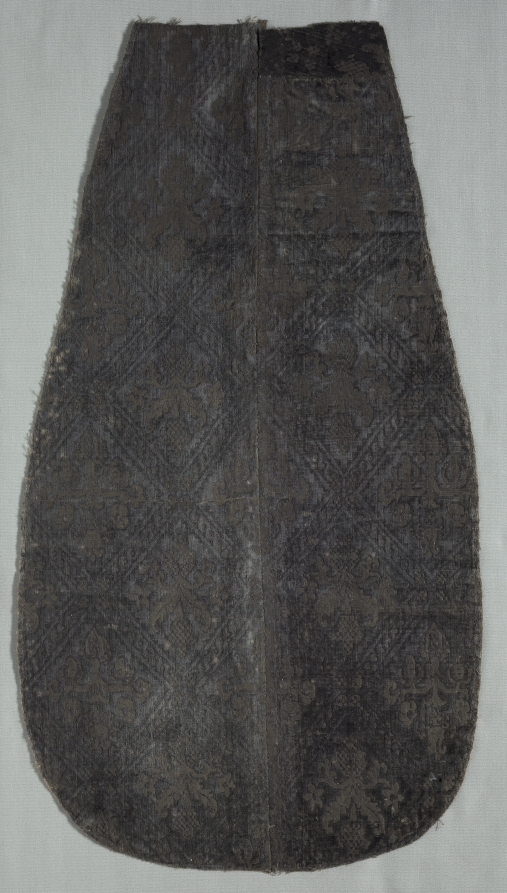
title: Velvet Fragment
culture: Italy, late 16th century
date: late 1500s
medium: velvet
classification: Velvet